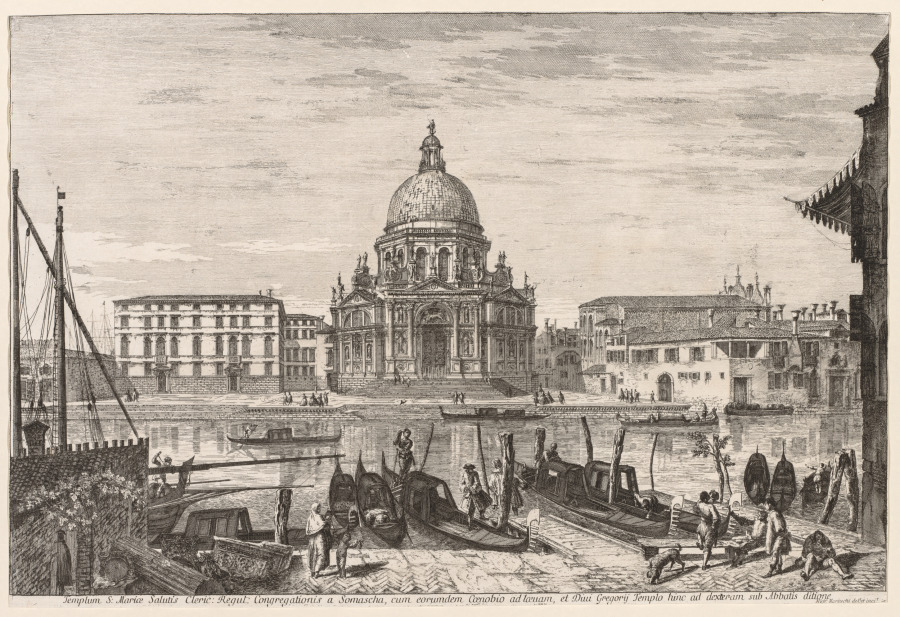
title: Views of Venice: S. M. Della Salute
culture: Italy, 18th century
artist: Michele Marieschi (Italian, 1710–1743)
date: 1741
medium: etching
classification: Print